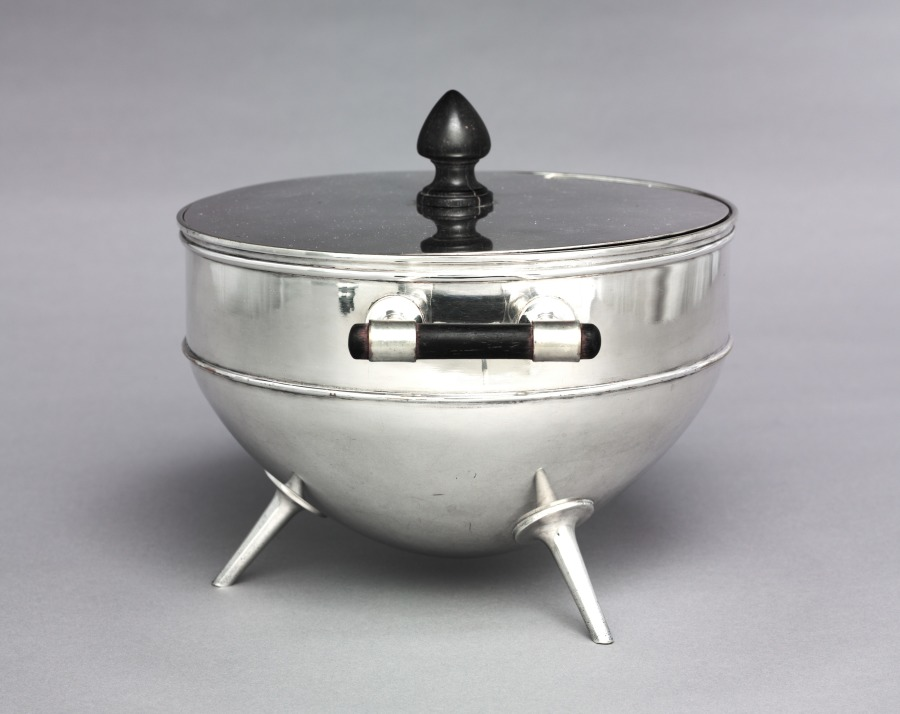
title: Covered Tureen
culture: England, 19th century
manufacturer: Hukin & Heath (British)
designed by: Christopher Dresser (British, 1834–1904)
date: c. 1880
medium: silver plated metal, ebony handles and knop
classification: Metalwork